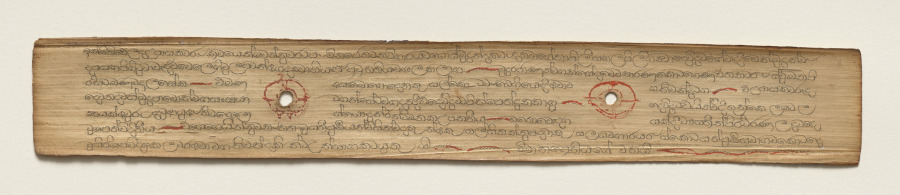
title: Leaf from a Buddhist Manuscript (verso)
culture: Sri Lanka, Singhalese, Late 17th century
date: c. 1700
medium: fiber paper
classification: Manuscript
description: Palm leaf material is still used for manuscripts in Sri Lanka. The palm leaves are prepared first by boiling them, drying them in the sun, and then rubbing them with oils. Scribes then use a metal stylus to incise the text. Then charcoal powder is wiped across the pages, filling in only the inscribed lines.